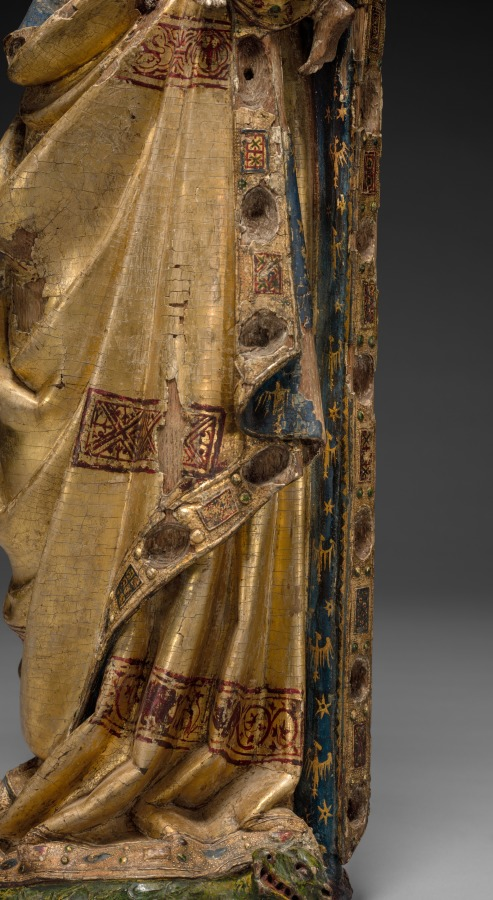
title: Virgin and Child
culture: Mosan (Valley of the Meuse), Liège(?), late 13th century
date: late 1200s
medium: wood (oak) with polychromy and gilding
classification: Sculpture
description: This sculpture is a rare survival in wood from the valley of the Meuse River (modern Belgium and Holland), an important region for the production of ecclesiastical art in the 1100s and 1200s. The elegantly draped figure is remarkable for the preservation of much of its original paint and gilding, including the Virgin's gilded mantle highlighted with decorative bands of geometric patterns and the green dragon on which she stands. There are small settings around the Virgin's neck and along the border of the mantle that would have originally been set with gem and glass cabochons in imitation of the richly adorned metalwork for which Mosan art was highly esteemed. The settings for these cabochons provide some hint of the original opulence of this sculpture. The Virgin's serene features and beautiful countenance are noteworthy, as is the refined execution of the draperies.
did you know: Dragons, like the one Mary is standing on, sometimes look more like snakes in medieval art.